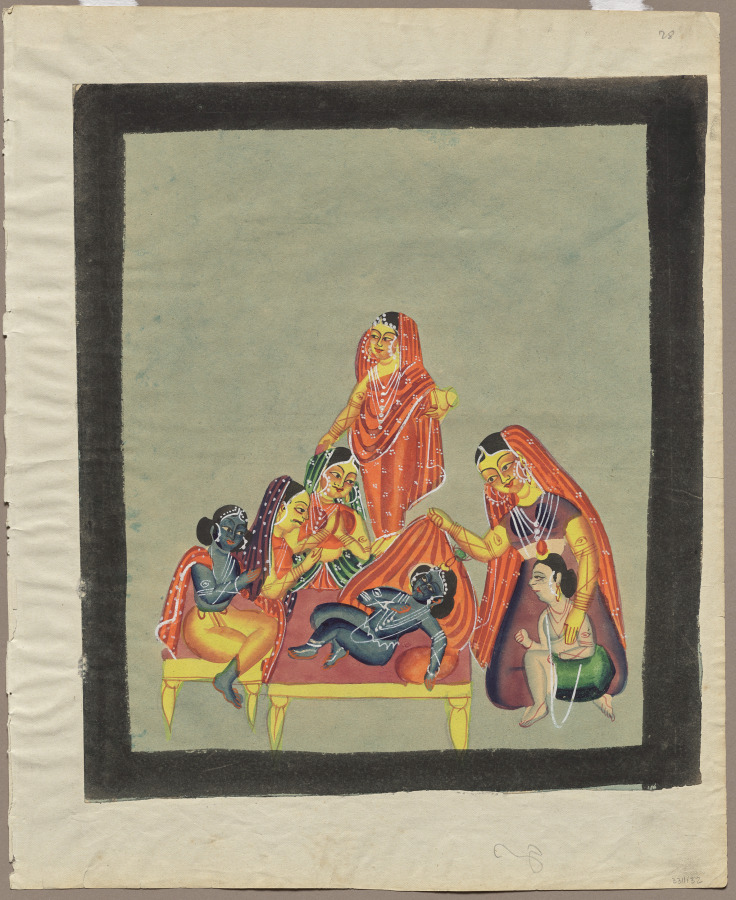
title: Worship of the Infant Krishna, from a Kalighat album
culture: Eastern India, Bengal, Kolkata, Kalighat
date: c. 1890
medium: Gum tempera, graphite, ink, and tin on paper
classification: Painting